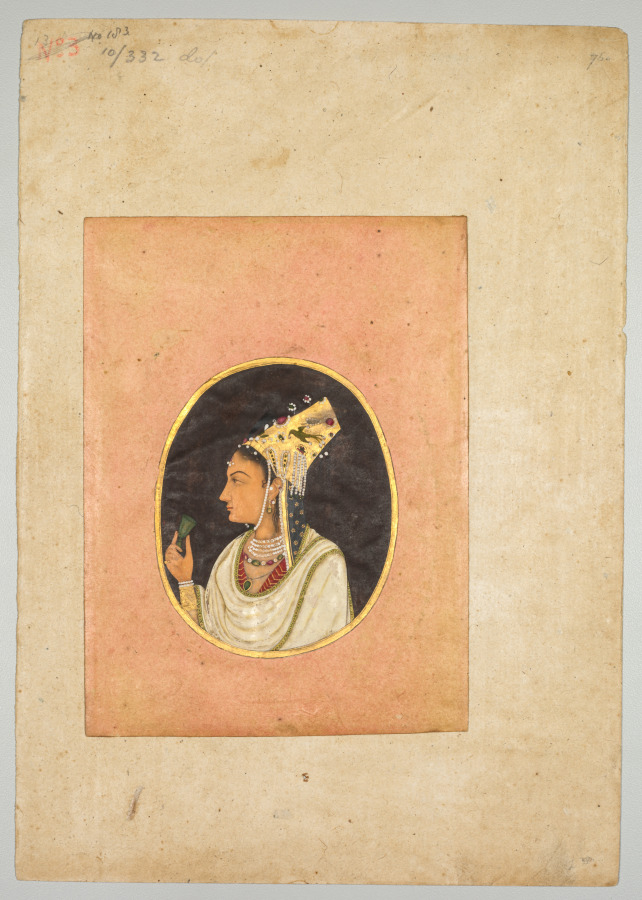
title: Oval portrait of a woman in a Chaghtai hat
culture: India, Mughal, 18th century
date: c. 1740–50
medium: Gum tempera and gold on paper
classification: Painting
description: The tall, flat-topped hat is an element of the native dress of the Mughals from eastern Uzbekistan. Of mixed Turkic and Mongol ethnicities, they spoke a Turkic language known as Chaghatai. Chaghatai refers to the name of the son of the Mongol Chingiz (Genghis) Khan, who ruled this area of Central Asia from 1246 to 1282. This woman’s hat has been studded with jewels and strings of pearls. The portrait jewel format that was once reserved for the emperor has now been expanded to include ladies of the court. The woman holds a jade wine cup and wears a draped upper garment with a woven or embroidered border similar to the fragment on display at the left.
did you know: She holds a delicate jade cup of the type for which the Mughals were famous.